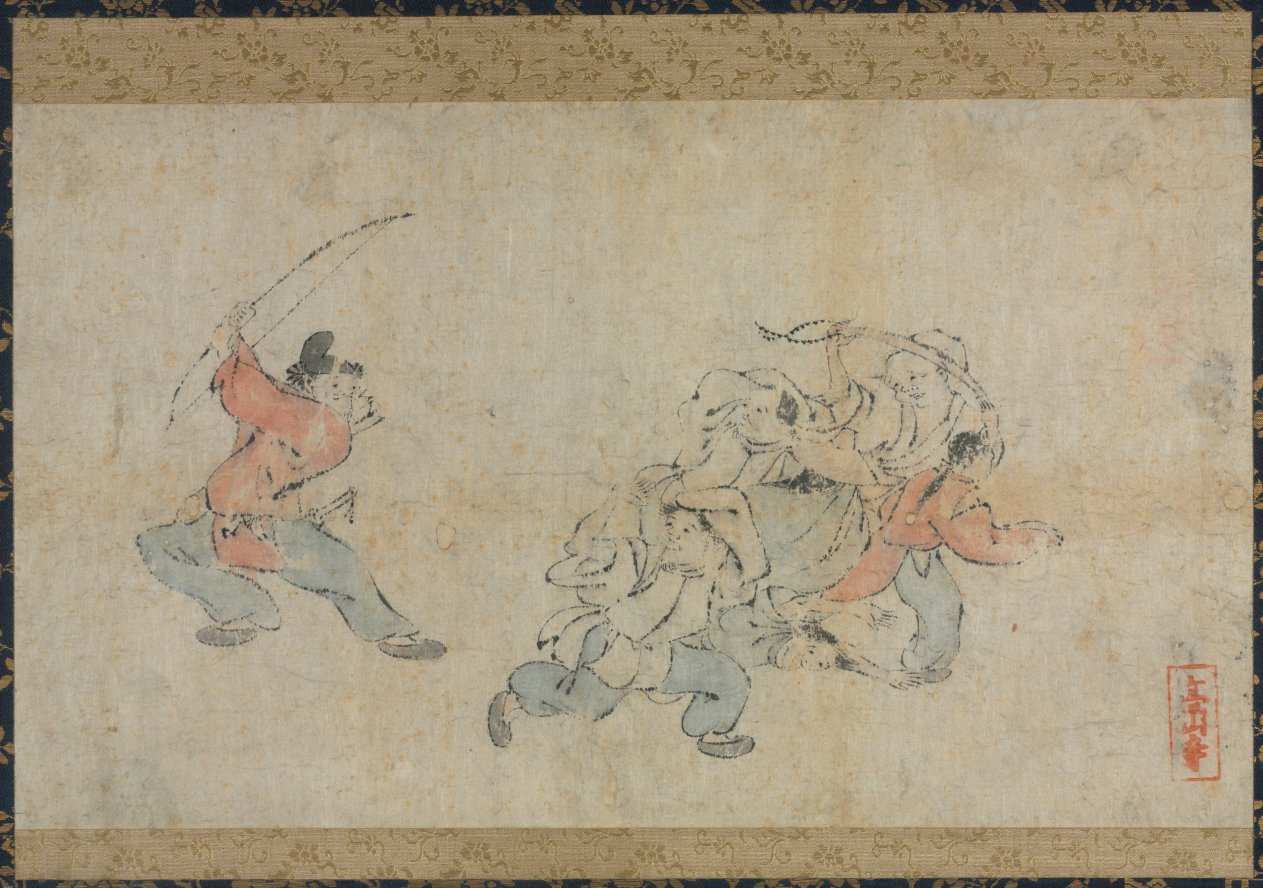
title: Toba-e (Comic Picture)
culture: Japan, Edo period (1615–1868)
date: c. 1615–99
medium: handscroll; ink and slight color on paper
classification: Painting